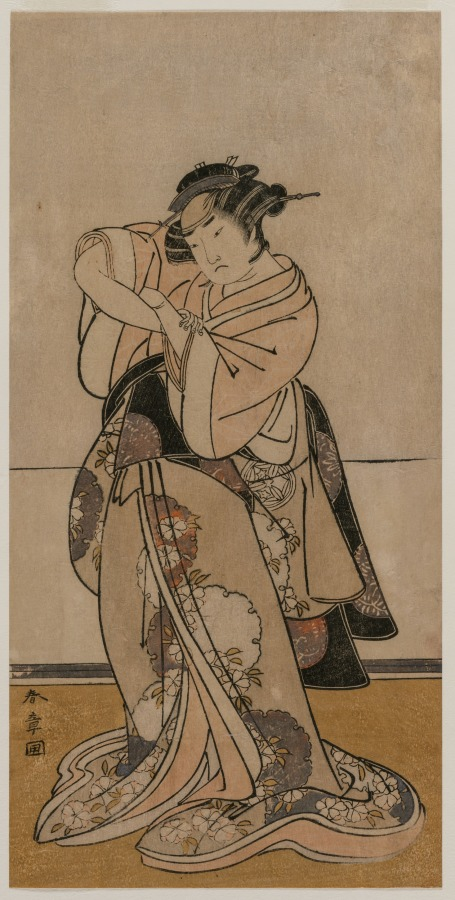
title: Actor Yamashita Yaozo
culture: Japan, Edo period (1615–1868)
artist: Katsukawa Shunshō (Japanese, 1726–1792)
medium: color woodblock print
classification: Print